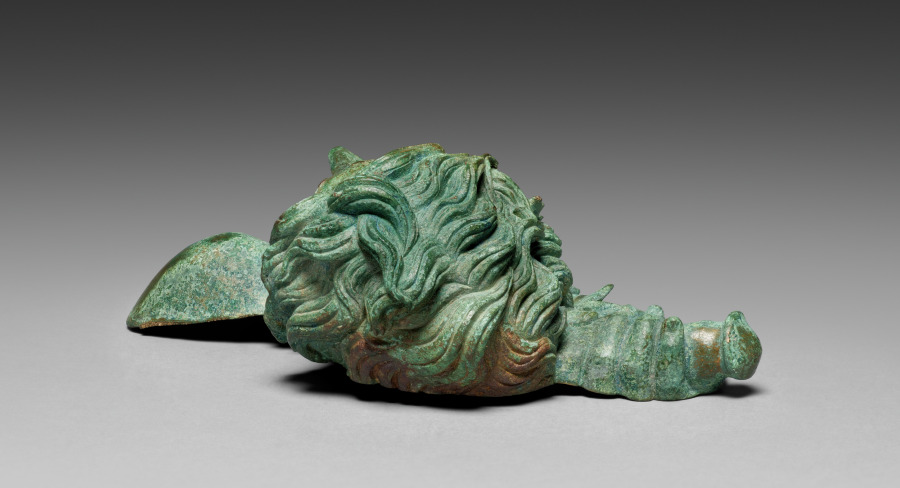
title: Tritoness or Scylla Relief Applique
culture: Greece, Hellenistic period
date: late 200s BCE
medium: bronze with copper inlays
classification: Metalwork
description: The seaweed garment, finned gills, and webbed ears give this female bust appliqué all the hallmarks of an ocean dweller. She may be a Tritoness, a minor goddess of the sea and the female counterpart to the more common Triton. However, her intense gaze and raised arm clutching perhaps the hilt of a sword suggest she may be Scylla, a sea monster that first appears in Homer’s Odyssey. Without the Tritoness’s fishtail or Scylla’s lower body made of dogs’ heads, it is difficult to differentiate. Certain features are highlighted with a copper inlay such as the lips, eyes, and gills.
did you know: Mythological sea creatures became popular metal vessel decorations around the 2nd-century BCE.